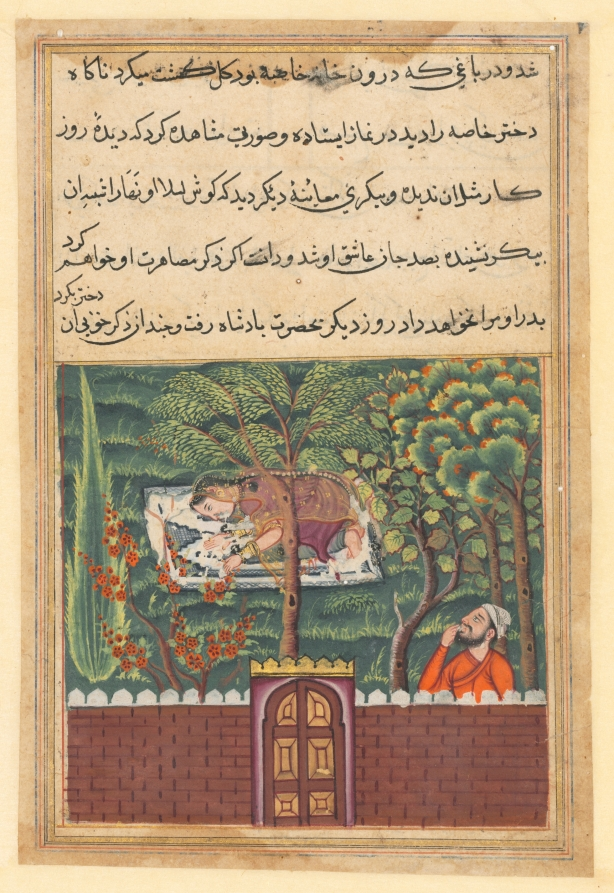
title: Khulasa, a vizier, sees the daughter of Khassa, another vizier, and covets her, from a Tuti-nama (Tales of a Parrot): Fifty-first Night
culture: Mughal India, court of Akbar (reigned 1556–1605)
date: c. 1560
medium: gum tempera, ink, and gold on paper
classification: Painting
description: Khulasa watches Khassa’s daughter as she kneels devoutly on a prayer rug in the garden. He touches his index finger to his mouth, signaling his awe and surprise. Despite his love, Khulasa knows that the woman is chaste and will not agree to marry him.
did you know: The woman’s figure has been painted over some sections of the tree in the foreground.